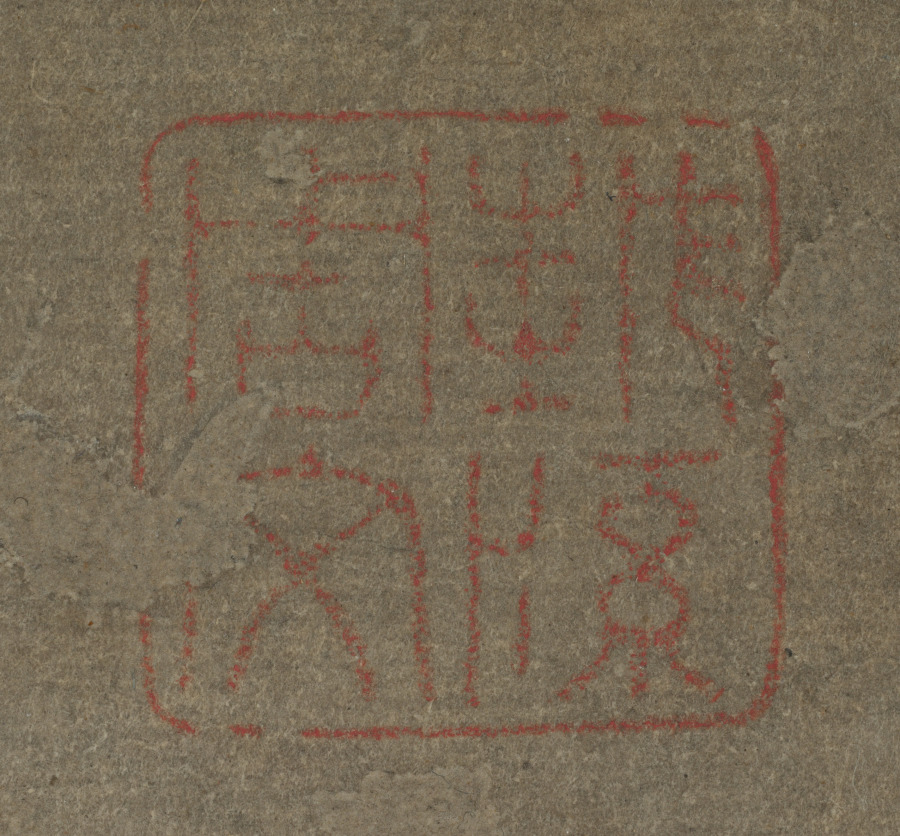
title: Chinese Servant Walking in the Rain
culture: Japan, Muromachi period (1392–1573)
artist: attributed to Gakuō Zōkyū (Japanese, active about 1482–1514)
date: 1500s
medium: hanging scroll; ink on paper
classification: Painting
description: Attributed to the artist Gakuō, this painting has a spurious seal of the influential Shōkokuji temple monk-painter Tenshō Shūbun (died about 1444–50), with whom he is said to have trained. Gakuō may have hailed from Ise in present-day Wakayama prefecture, an area south of Kyoto in the Kansai region. Although not much is known about his life, inscriptions on some of his paintings indicate strong ties with eminent monks in Kyoto’s major Zen temples.